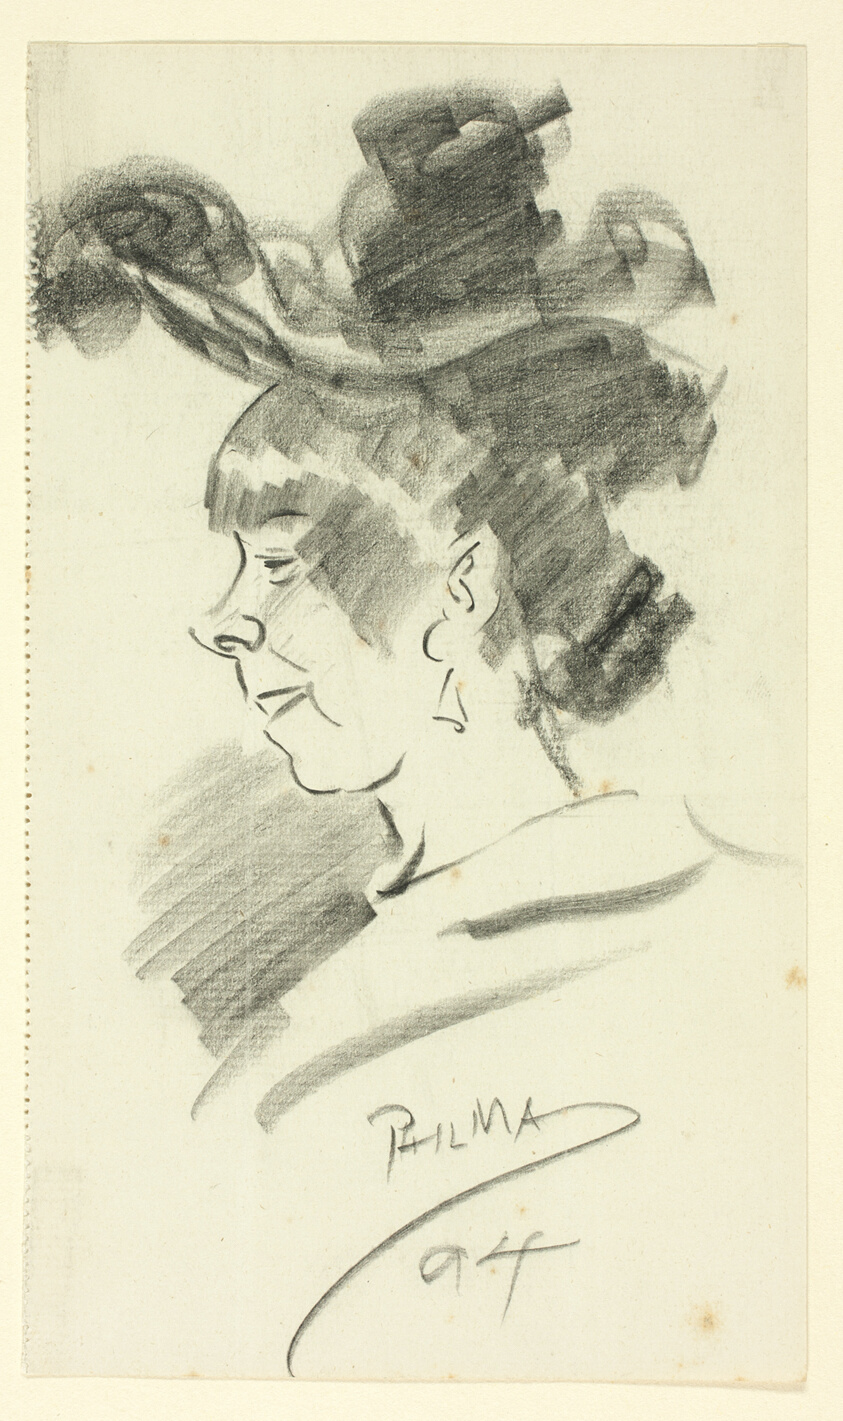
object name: Drawing and Watercolor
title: Profile of a Woman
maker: Philipp William May; English, 1864-1903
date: 1894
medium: Graphite on ivory laid paper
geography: England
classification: graphite; drawings (visual works); prints and drawing